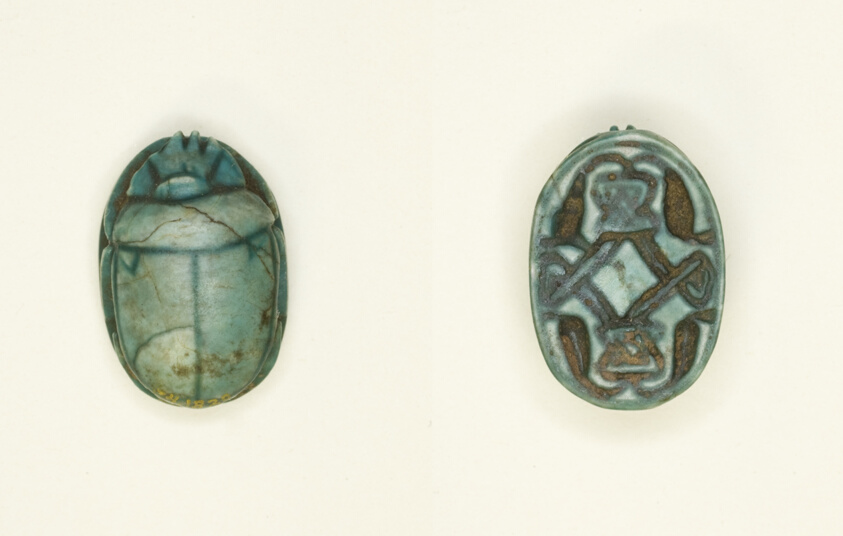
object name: Costume and Accessories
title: Scarab: Cobras Addorsed and Linked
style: new kingdom, eighteenth dynasty, ancient, egyptian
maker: Egyptian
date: New Kingdom, Dynasty 18 (about 1550–1295 BCE)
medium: Glazed steatite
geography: Egypt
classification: scarab; seal; amulet; ancient art; costume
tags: scarab beetle, snakes, serpents, scrolls (motifs)